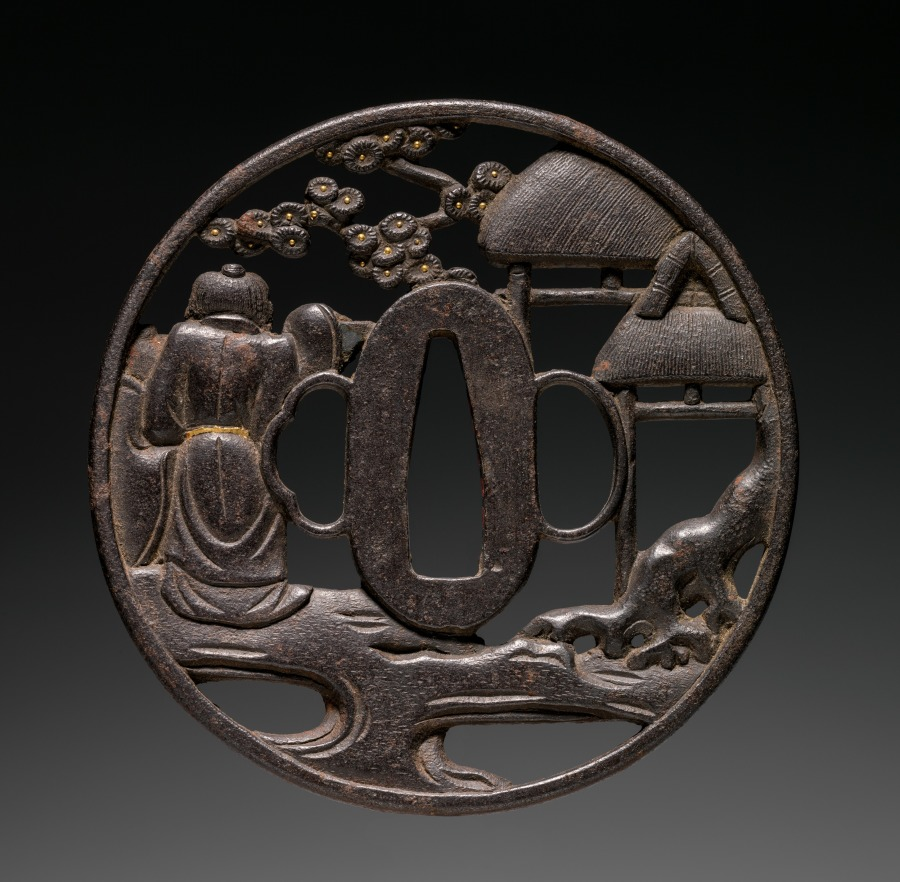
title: Sword Guard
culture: Japan, Edo period (1615–1868)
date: c. 1800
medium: iron (Soten type)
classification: Arms and Armor